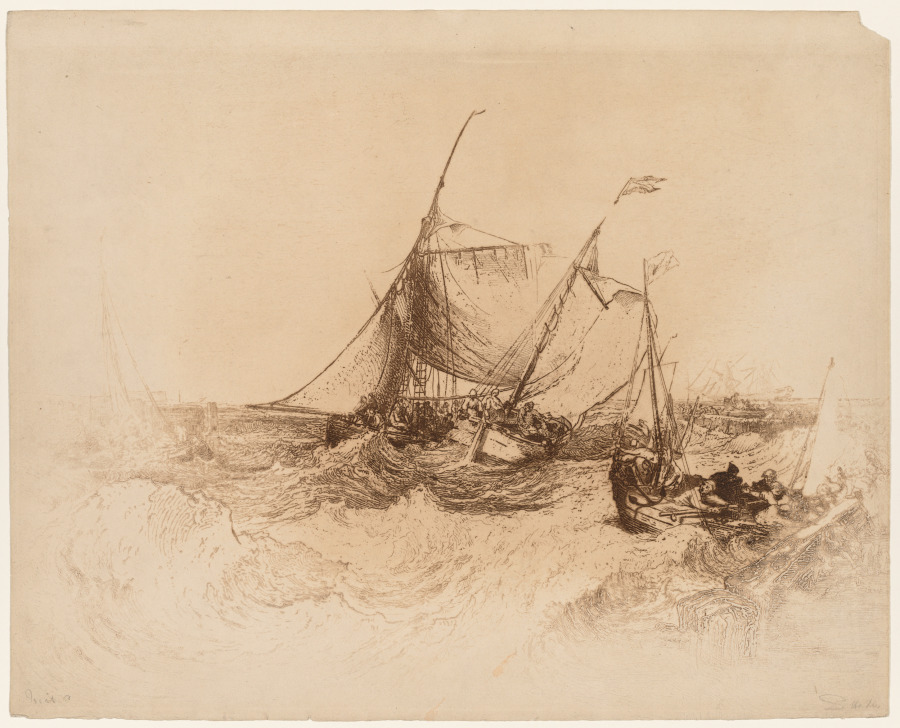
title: Calais Pier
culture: England, 19th century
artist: Francis Seymour Haden (British, 1818–1910)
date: 1865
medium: etching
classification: Print